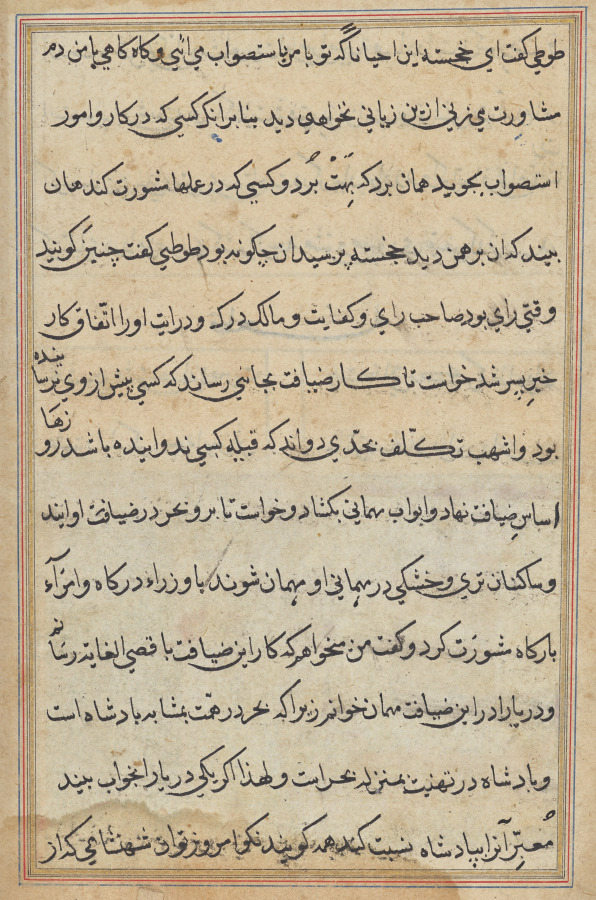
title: Page from Tales of a Parrot (Tuti-nama): text page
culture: Mughal India, court of Akbar (reigned 1556–1605)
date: c. 1560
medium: gum tempera, ink, and gold on paper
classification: Painting